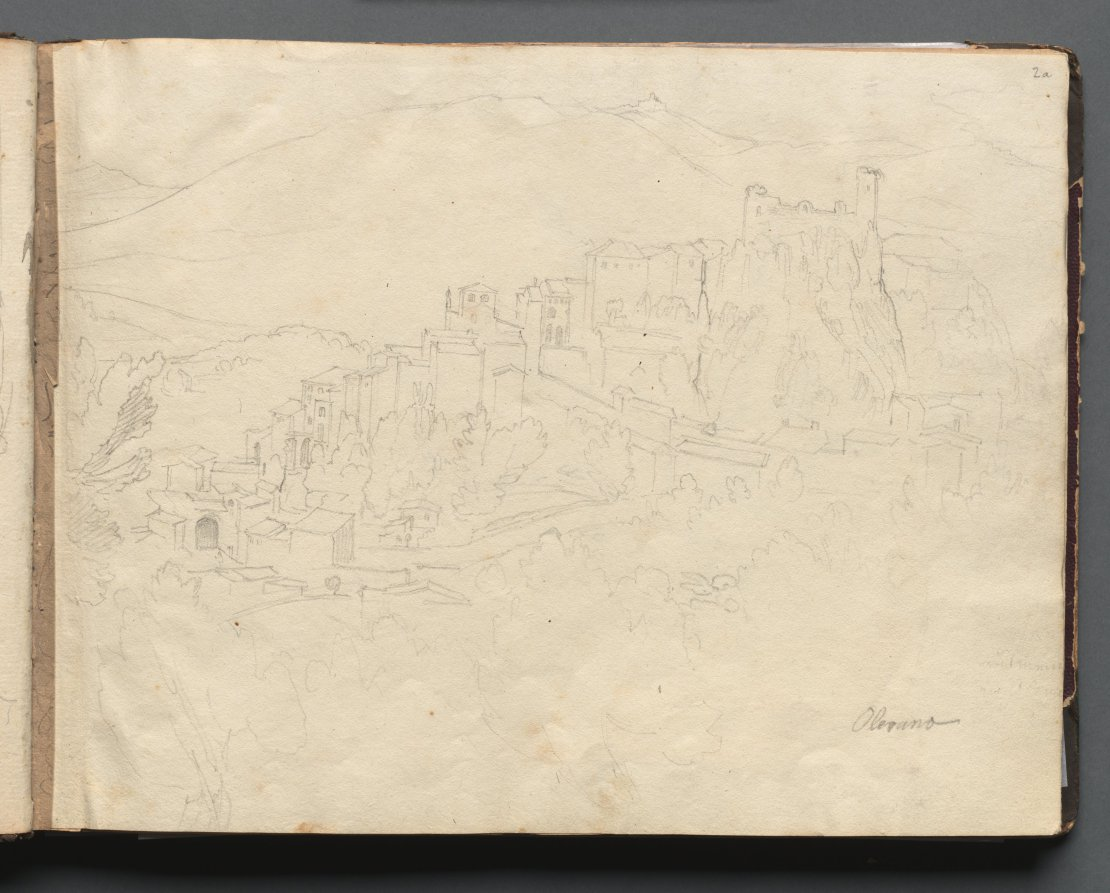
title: Album with Views of Rome and Surroundings, Landscape Studies, page 02a: "Olevano"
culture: Germany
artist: Franz Johann Heinrich Nadorp (German, 1794–1876)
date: c. 1830s-70s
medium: graphite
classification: Bound Volume